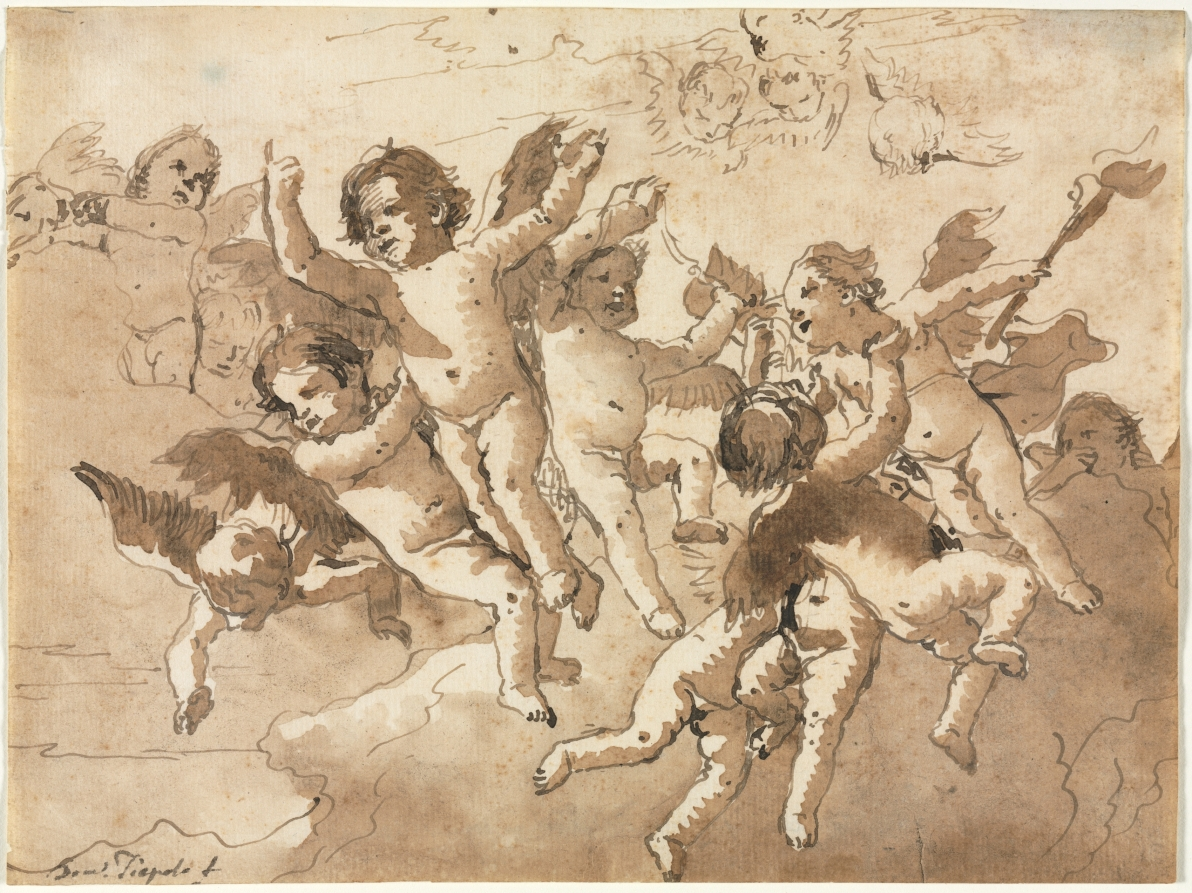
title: Cupid in the Clouds with Attendant Cherubs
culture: Italy, 18th century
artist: Giovanni Domenico Tiepolo (Italian, 1727–1804)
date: 1757 or after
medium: pen and brown ink and brush and brown wash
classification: Drawing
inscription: signed, lower left, in brown ink: Dom. Tiepolo f ; VERSO, lower left, in graphite: [s] [circled] F / F E O [sideways] ; across bottom, in graphite: C - 177 - [Bt from Manillo Mss?] Venice 1929 ; lower center, in graphite: Dom Tiepolo [Jr?]